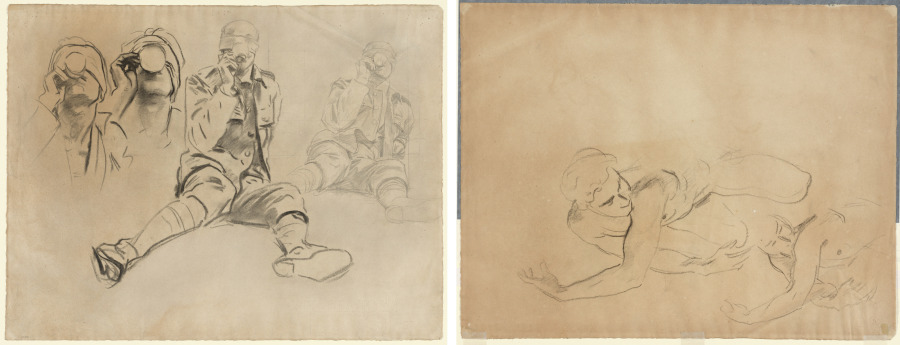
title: Studies of a Soldier Drinking, for Gassed (recto); Studies of a Male Nude (verso)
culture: America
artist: John Singer Sargent (American, born Italy, 1856–1925)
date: 1918–19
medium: charcoal (stumped in places) (left figures) and graphite (right figure); squared in graphite (right figure)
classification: Drawing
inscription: recto: signed?, lower left, in graphite: JS.312.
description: In 1919, Sargent exhibited a large painting at the Royal Academy of Art in London called Gassed. The Dressing Station at Le Bac and on the Doullers-Arras Road. The British War Memorial Committee had commissioned the work from him as a way of honoring the sacrifices of World War I. The subject was based on a scene the artist actually witnessed during his visit to battlefields in France in 1918. This drawing is a study for one of the soldiers in the painting, which now hangs in the Imperial War Museum in London.